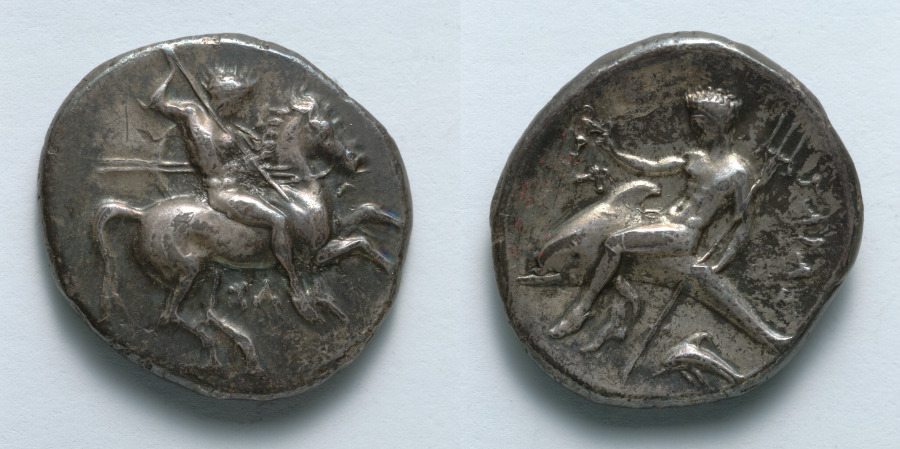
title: Stater: Nude Warrior on Horseback (obverse); Taras (reverse)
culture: Greek, minted at Taras (South Italy)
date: 334–302 BCE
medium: silver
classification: Coins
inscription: ΤΑΡΑΣ